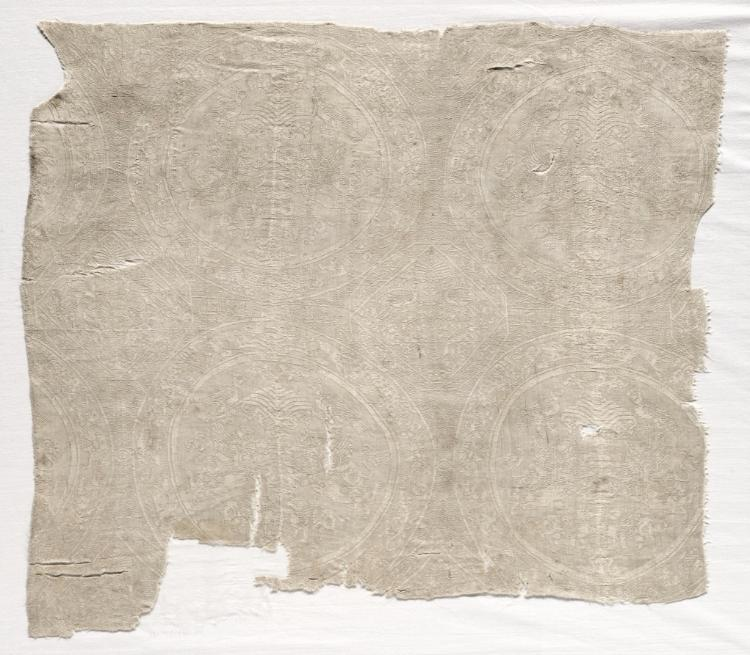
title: Fragment with confronted animal medallions and kufic bands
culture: Iran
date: 1480–1649 (radiocarbon date, 95% probability)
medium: Silk: diasper, tabby weave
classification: Textile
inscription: Wa-kull ma badharahu al-Raman la-mu'awwal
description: The fragment preserves a wide central band flanked by narrower inscription bands. The narrower bands contain, on a dark blue background, a continuous inscription in elaborate Kufic, the ivory-colored lettering oriented at right angles to the warp. On the wider ivory panel there appear ovals enclosing a frieze of running animals within which are hexagons enclosing stars. The ovals alternate vertically with cartouches containing an inscription in simple Kufic, the design appearing in blue, pink, and ivory.